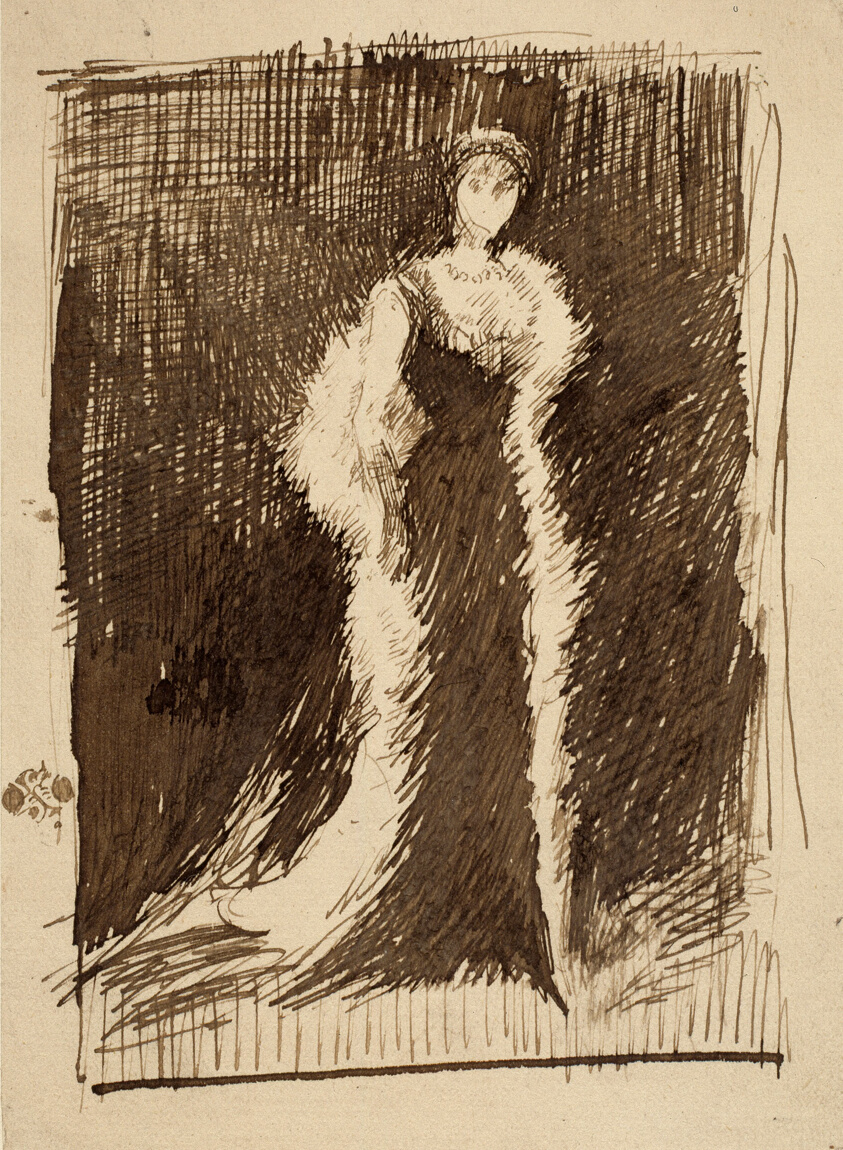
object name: Drawing and Watercolor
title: Sketch after "Arrangement in Black: Lady Meux"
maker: James McNeill Whistler (American, 1834-1903)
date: c. 1881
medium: Pen and brown ink on cream wove paper laid down on ivory board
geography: United States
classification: pen and ink drawings; drawings (visual works); prints and drawing; paper